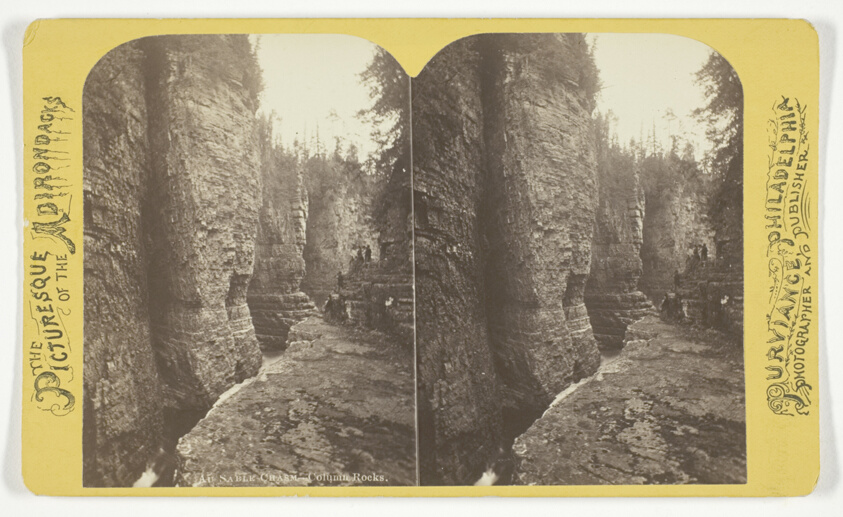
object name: Photograph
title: Au Sable Chasm - Column Rocks, from the series "The Picturesque of the Adirondacks"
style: 19th century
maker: William Purviance; American, active mid 19th century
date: 1860/68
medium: Albumen print, stereo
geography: Philadelphia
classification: photography; photograph